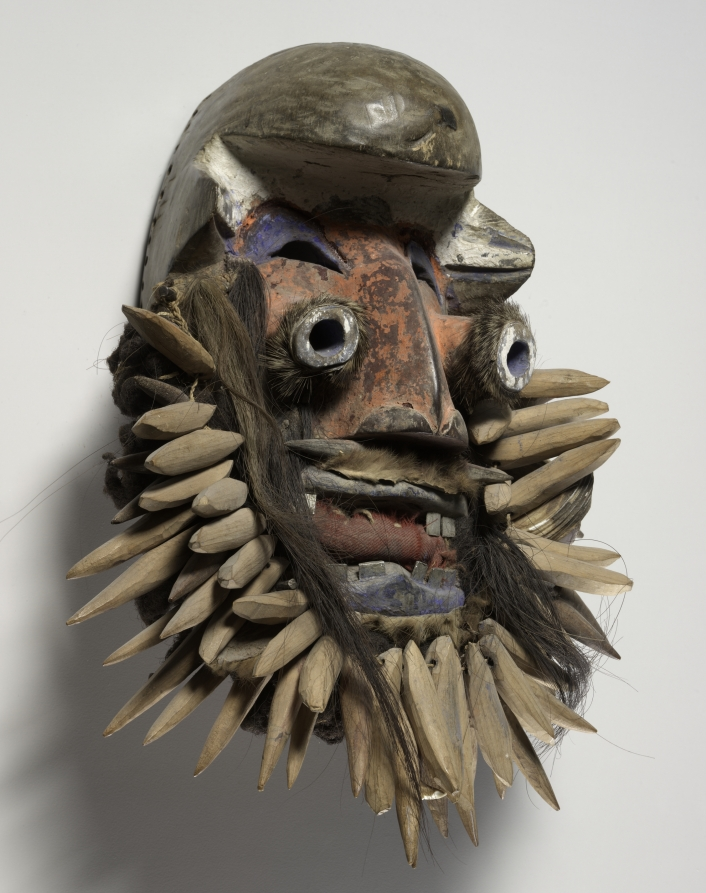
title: Face Mask (Tehe gla)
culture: Africa, West Africa, Côte d'Ivoire or Liberia, Wè-style carver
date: early 1900s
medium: Wood, boar tusks, pelt, cloth, human hair, probably aluminum, reeds, iron alloy, copper alloy, plant fiber, and paint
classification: Mask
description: Tubular eyes and the fringe of carved leopard canine teeth identify this mask as male. Such masks appeared only during very important moments. The dancer wore a leopard skin over his head and shoulders, held an elephant's tusk in his hand, and had his face painted white. The masks function as peacemakers; they led soldiers into battle, and administered justice.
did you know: The masquerader who wore this mask also had a body costume of layers of raffia and matching anklets; cloth covered their head.